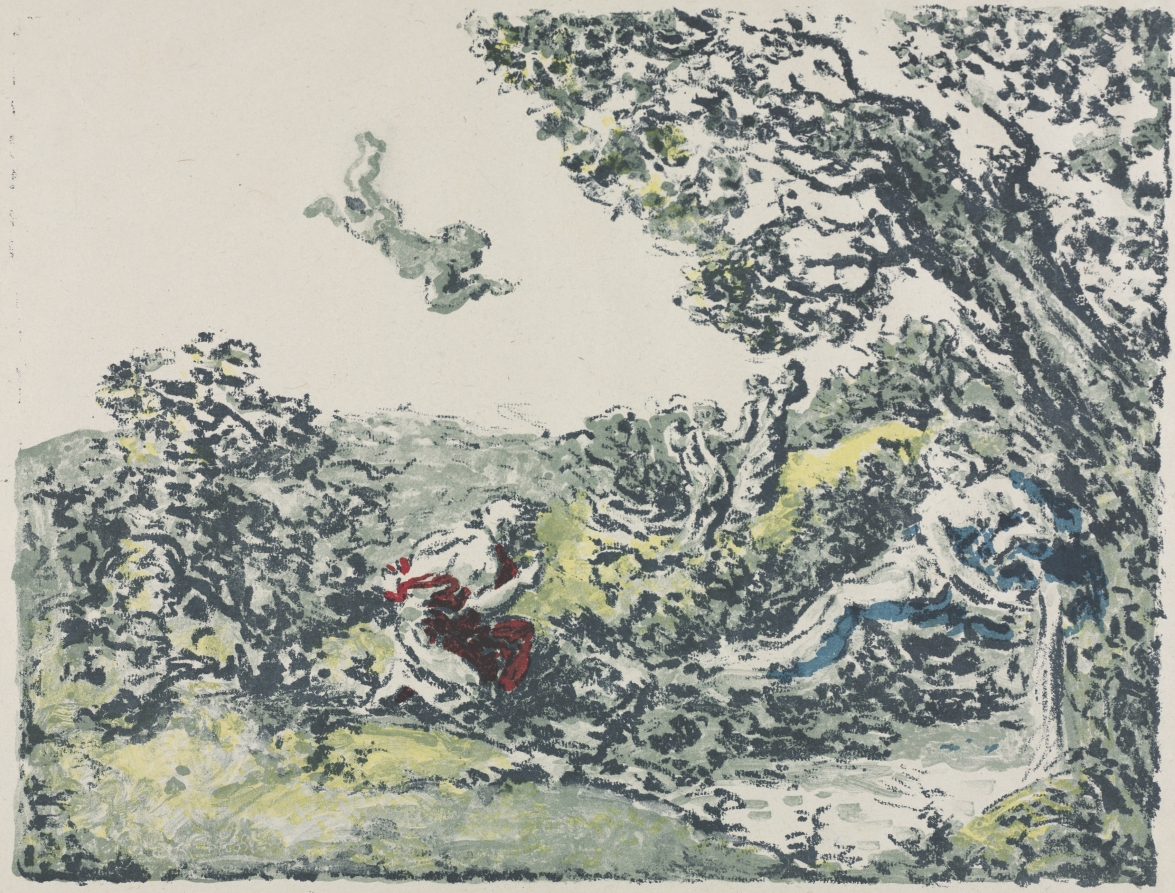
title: Satyr and Flying Cupid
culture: France, 20th century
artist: Ker Xavier Roussel (French, 1867–1944)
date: 1900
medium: color lithograph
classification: Print